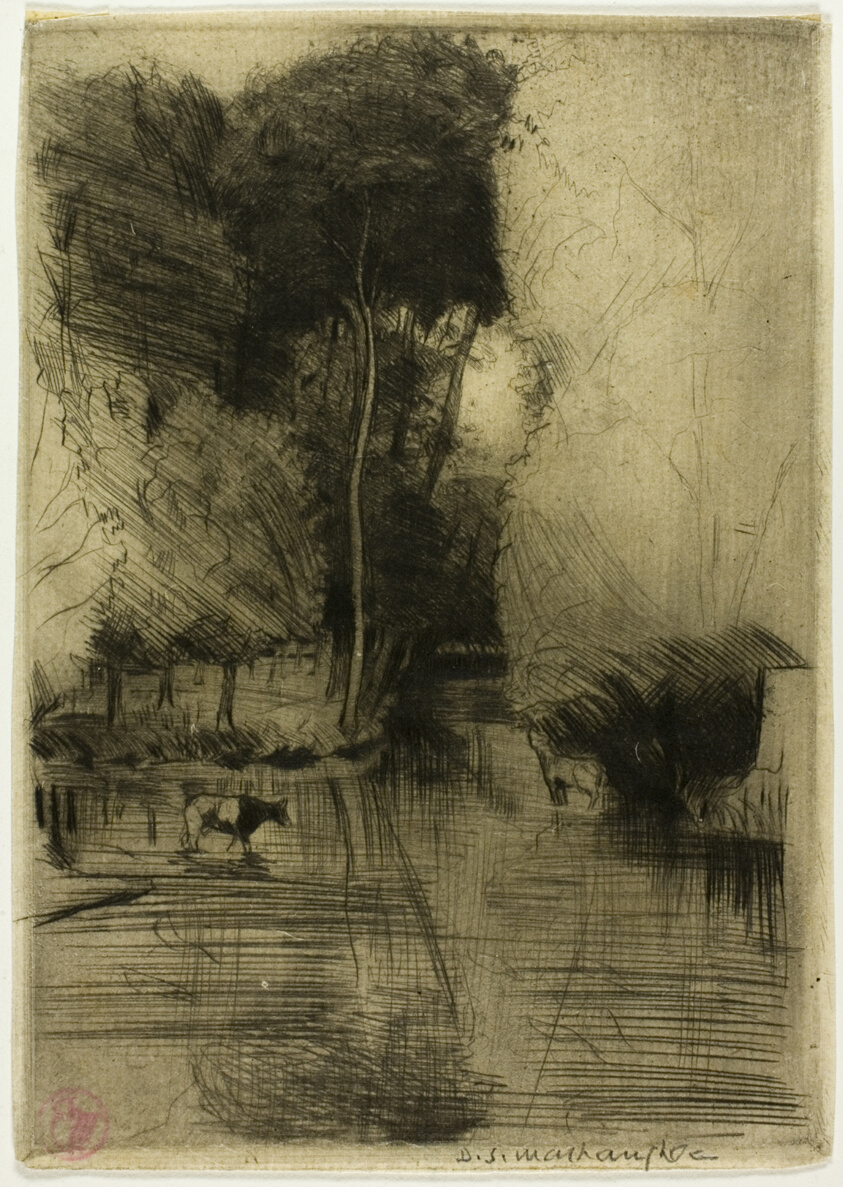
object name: Print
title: Mill Stream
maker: Donald Shaw MacLaughlan (American, born Canada, 1876-1938)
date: 1899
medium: Drypoint in black on cream laid paper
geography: United States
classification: drypoint; print; prints and drawing